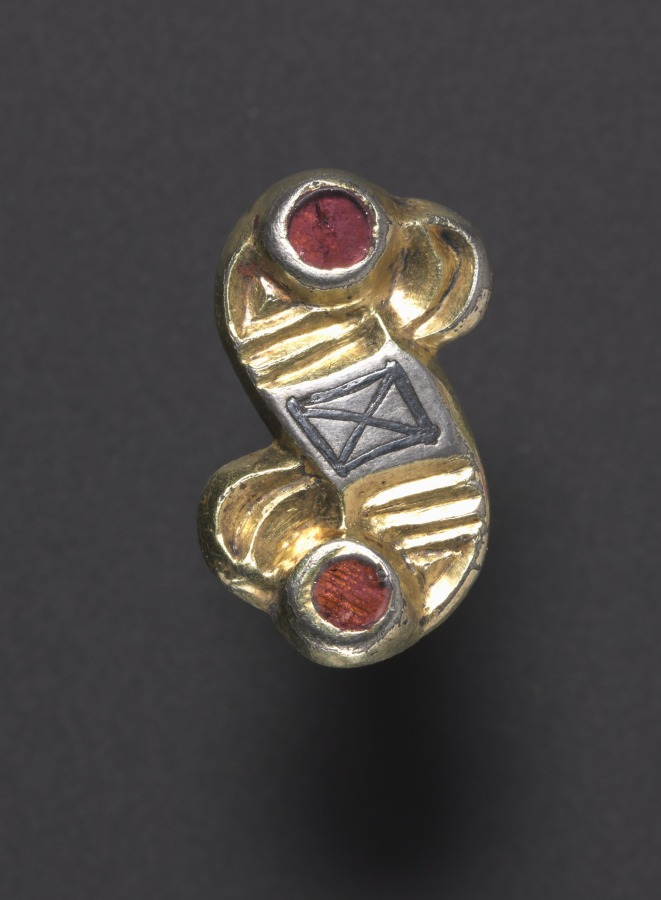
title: S-Shaped Fibula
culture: Alemannic, 6th century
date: 500s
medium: silver gilt with garnets and niello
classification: Jewelry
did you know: This fibula is attributed to the Alemanni, meaning "all men," who got their name from being a group of many Germanic tribes.